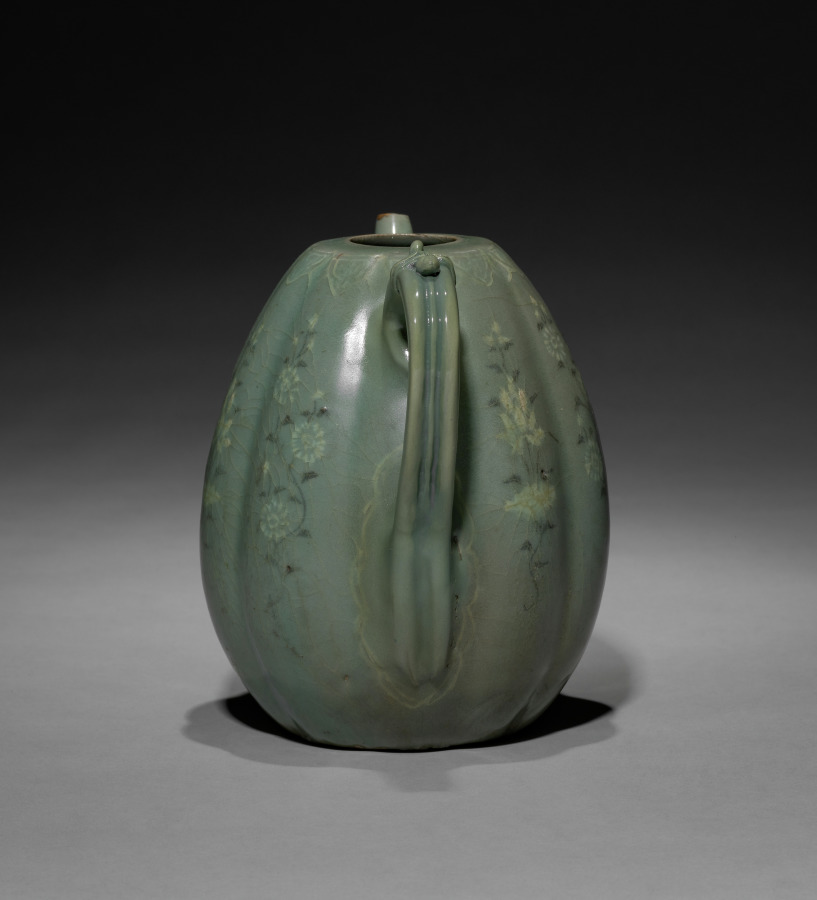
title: Melon-shaped Ewer with Incised Peony Design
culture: Korea, Goryeo dynasty (918–1392)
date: 918–1392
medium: pottery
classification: Ceramic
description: This melon-shaped pitcher is adorned with a delicate drawing that renders chrysanthemum buds with full blossoms in white and black inlays. In Korea, chrysanthemum flowers and leaves were made into both tea and wine. Chrysanthemum wine was enjoyed during the the Double Nine Festival (the ninth day of the ninth month in the lunar calendar) when praying for longevity.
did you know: The shape of this pitcher resembles a type of yellow muskmelon cultivated mainly in East Asia.